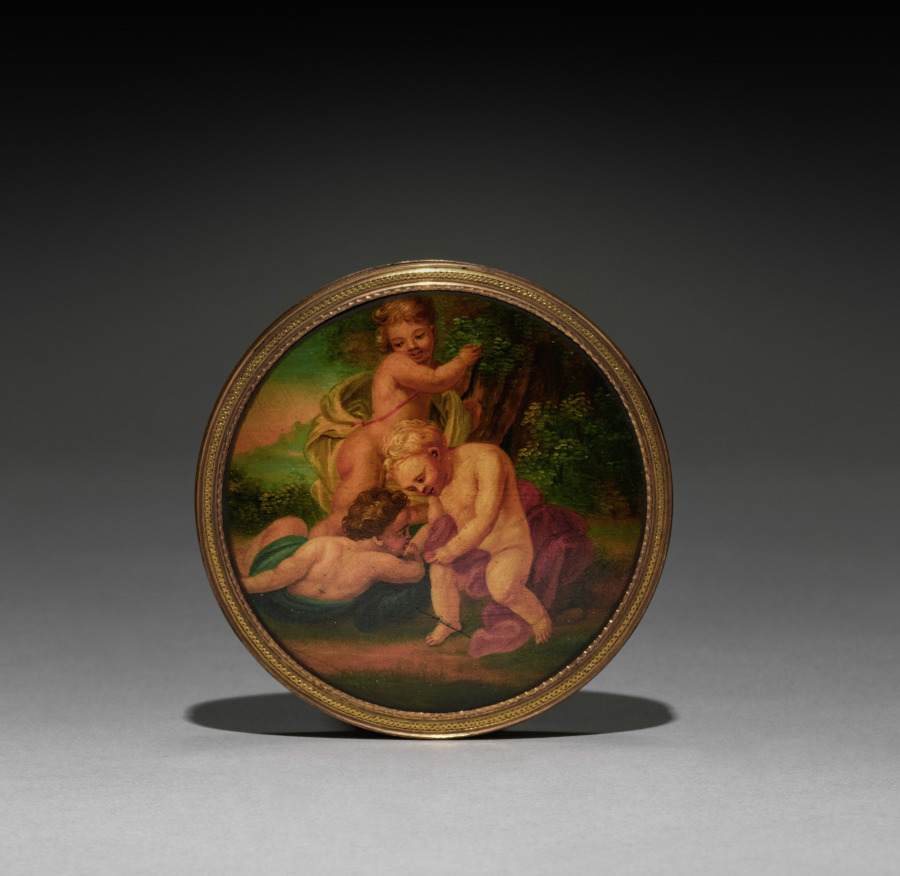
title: Cover for a Box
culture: France, 18th century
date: 1700s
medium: lacquer with tortoiseshell lining, gilt metal mounts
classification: Miscellaneous